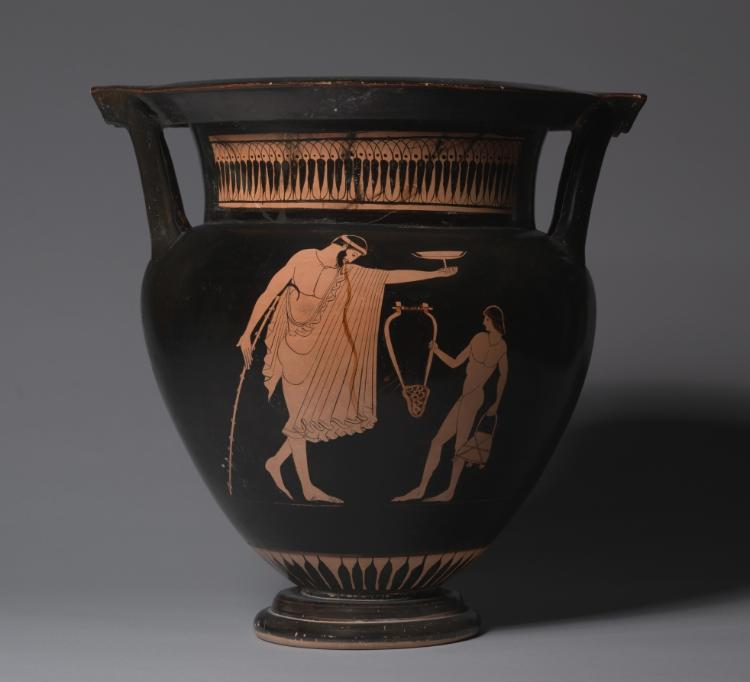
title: Red-Figure Column Krater (Mixing Vessel): Komos (Revel)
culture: Greek, Attic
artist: attributed to Pig Painter (Greek, Attic, active c. 480–460 BCE)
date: 470–460 BCE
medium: ceramic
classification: Ceramic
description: Used for mixing wine and water at a symposium (or drinking party), this column-krater speaks to the perils and pleasures of drinking. On one side, a bearded man holding a staff and a drinking cup leans forward, a red stream of vomit falling from his mouth. Before him is a nude young boy, holding a tortoiseshell lyre and a basket or pail. On the other side, a young man dances, holding a deep cup and wearing just one boot. On the neck above him, scratched in large letters, is the name SIMONOS, probably indicating that the vase once belonged to someone named Simon.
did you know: The bearded man on this vase is vomiting—perhaps a humorous warning against over imbibing.